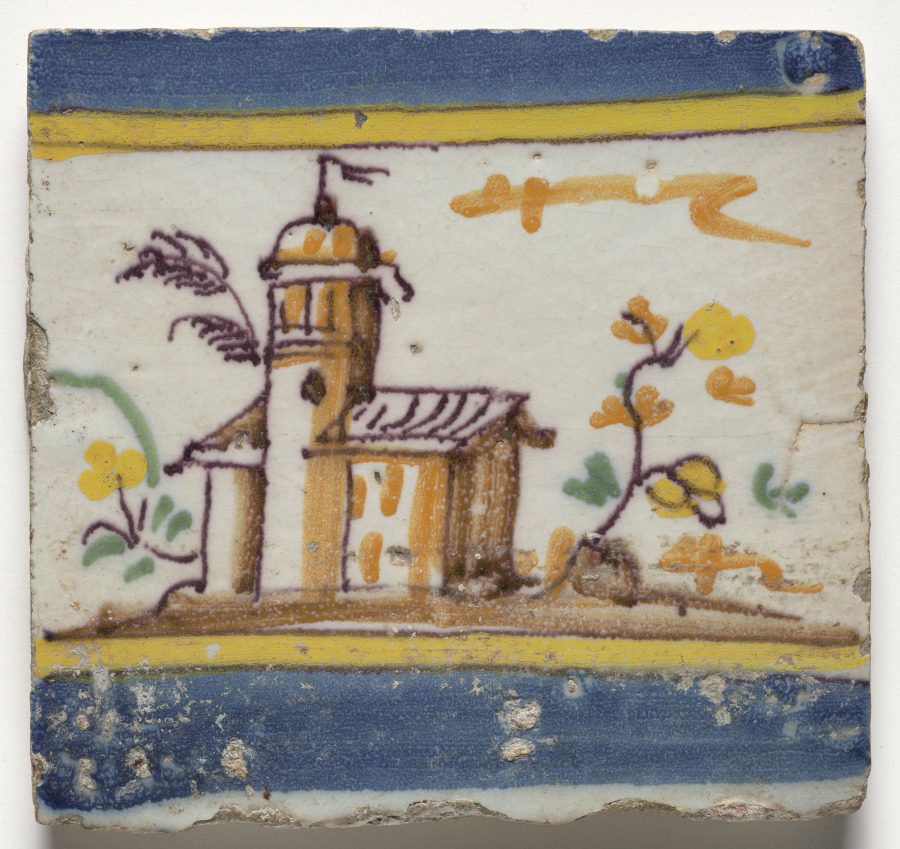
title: Wall Tile–Building with Tower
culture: Spain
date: c. 1600s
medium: glazed ceramic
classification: Ceramic